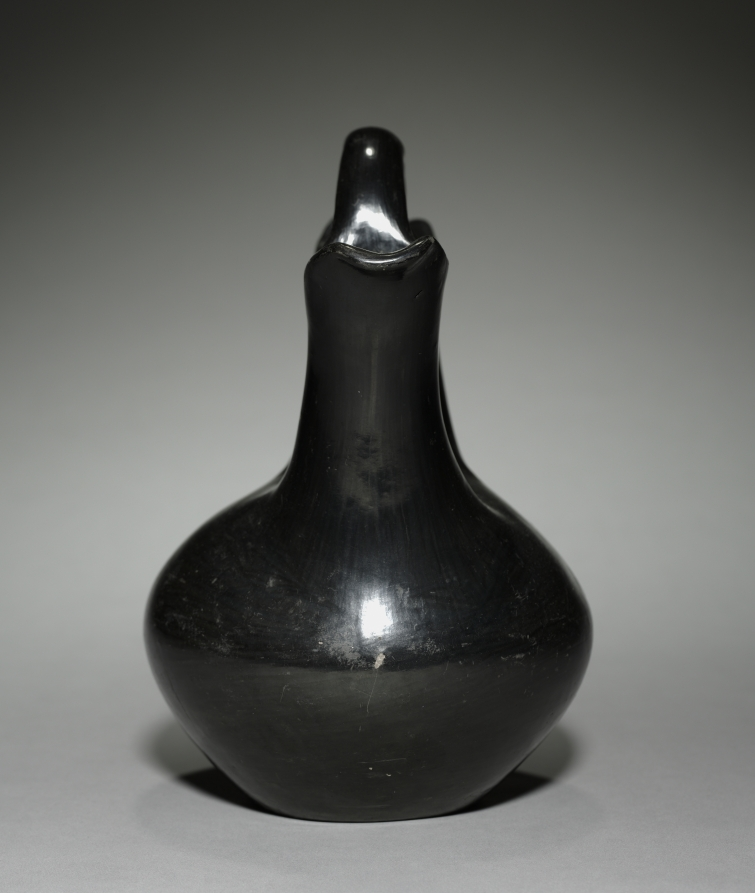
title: Wedding Jar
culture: Southwest, Pueblo, Santa Clara, Post-Contact, 20th century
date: c. 1900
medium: ceramic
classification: Ceramic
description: At Santa Clara Pueblo, the double-spouted wedding jar is made not only to sell but also for use during its namesake ceremony, when the bride and groom drink from opposite spouts. The origin of the unusual form is unclear; once considered a modern innovation, it may instead be an ancient form revived in the late 1800s, perhaps in response to market forces that tourism set in play. This example is made from the black ware for which Santa Clara potters are known.